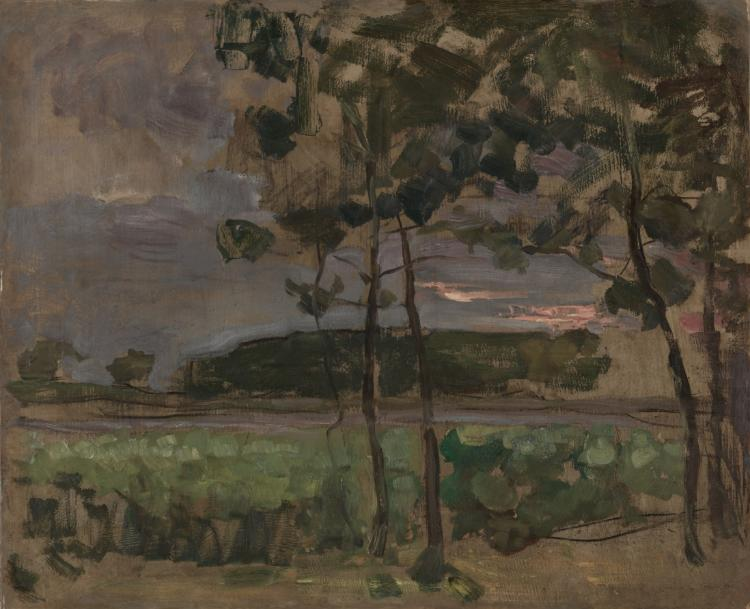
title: Field with Young Trees in the Foreground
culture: Netherlands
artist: Piet Mondrian (Dutch, 1872–1944)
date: c. 1907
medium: oil on paper laid on board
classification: Painting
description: This painting depicts a field around the hamlet of Oele in the eastern Netherlands, where Mondrian lived during the summer of 1907. The evocative mood created by the trees silhouetted against a twilight sky suggests that Mondrian’s search for spirituality was present before he began painting completely abstract or non-objective compositions in 1916. Guided by readings in metaphysics and philosophy, Mondrian sought to achieve a higher spiritual reality in his paintings, which eventually led him to eliminate all representational elements in favor of a style of pure geometric abstraction.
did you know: Mondrian was a prolific writer drawn to spiritual studies and he believed that art and philosophy were deeply interconnected.